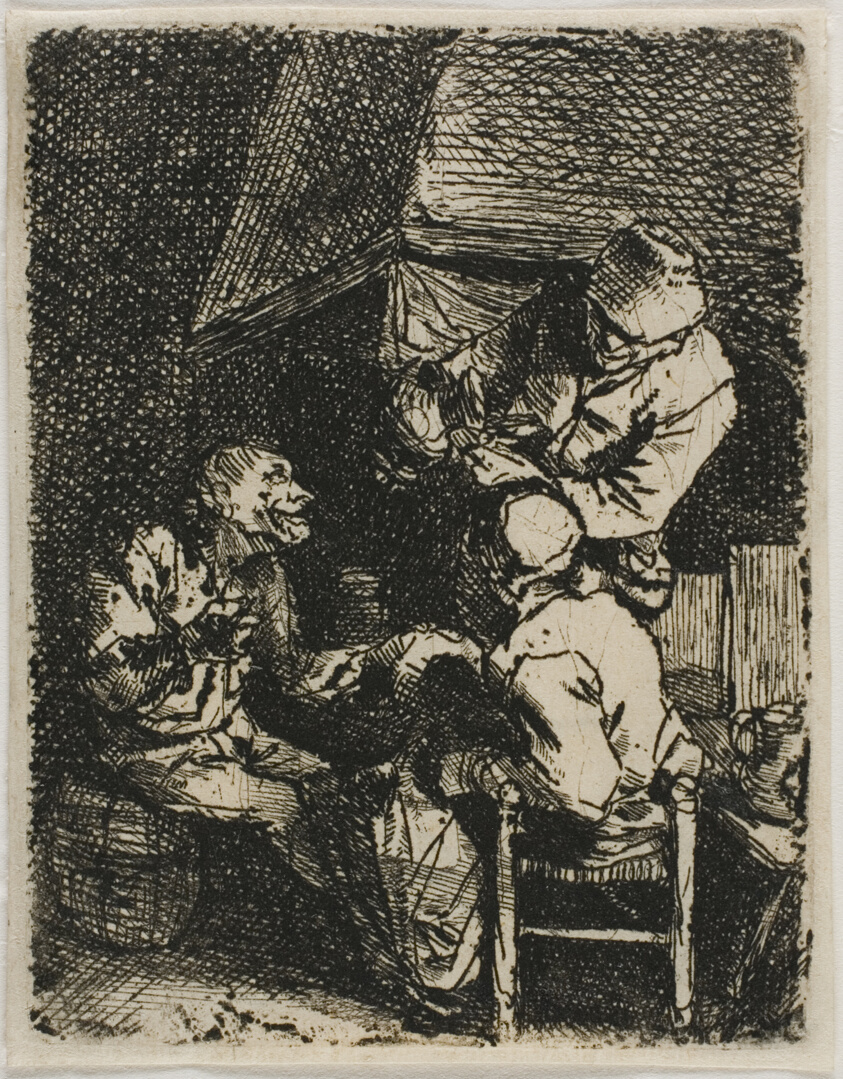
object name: Print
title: Three Peasants by a Fireplace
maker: Cornelis Pietersz Bega; Dutch, 1631/32-1664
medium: Etching printed in black on paper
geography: Netherlands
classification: etching; print; prints and drawing